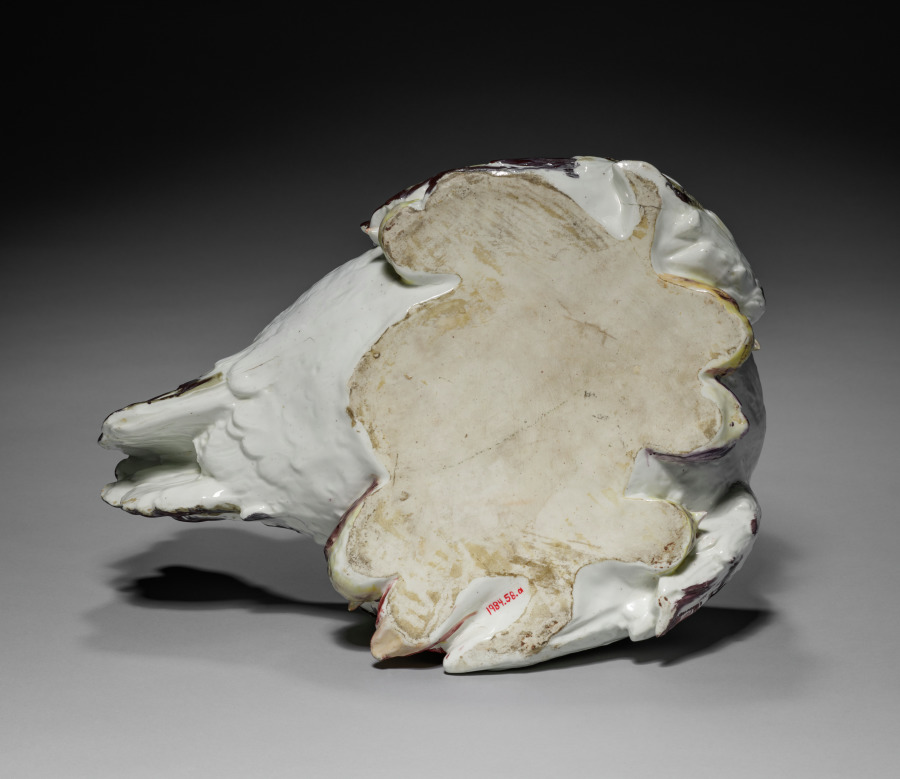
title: Hen and Chicks Tureen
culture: England, London, Chelsea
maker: Chelsea Porcelain Factory (Britain, London, 1745–84)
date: c. 1755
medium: porcelain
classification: Ceramic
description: The ceramic factory at Chelsea, located along the river Thames in western London, was Britain’s most renowned factory of decorative porcelain in the mid-1700s. Large tureens in the form of chickens or rabbits appealed to wealthy aristocrats, who took great care in developing specimen animal and poultry breeds on their country estates. The design for this particular tureen was taken from a popular seventeenth-century print by Francis Barlow depicting a farmyard.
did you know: See cover record.